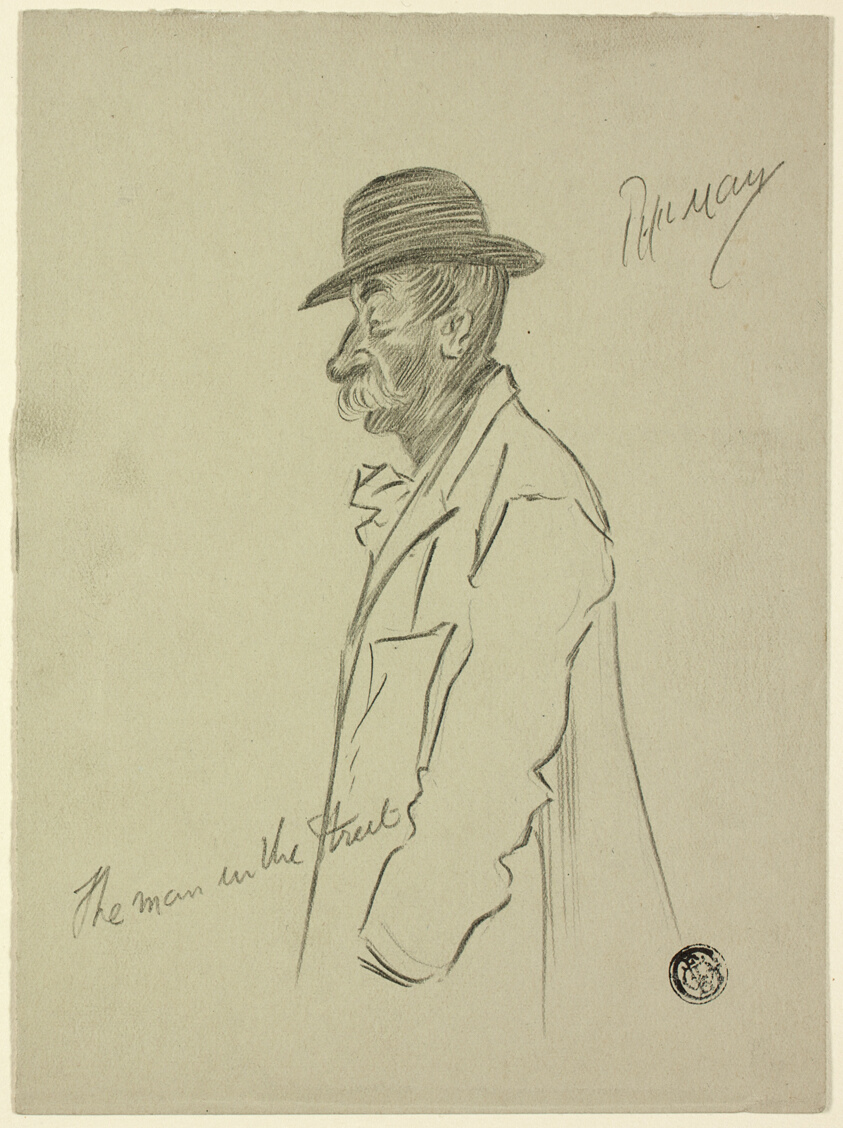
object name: Drawing and Watercolor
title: The Man in the Street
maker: Philipp William May; English, 1864-1903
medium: Black crayon and graphite on gray wove paper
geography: England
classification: crayon; drawings (visual works); prints and drawing